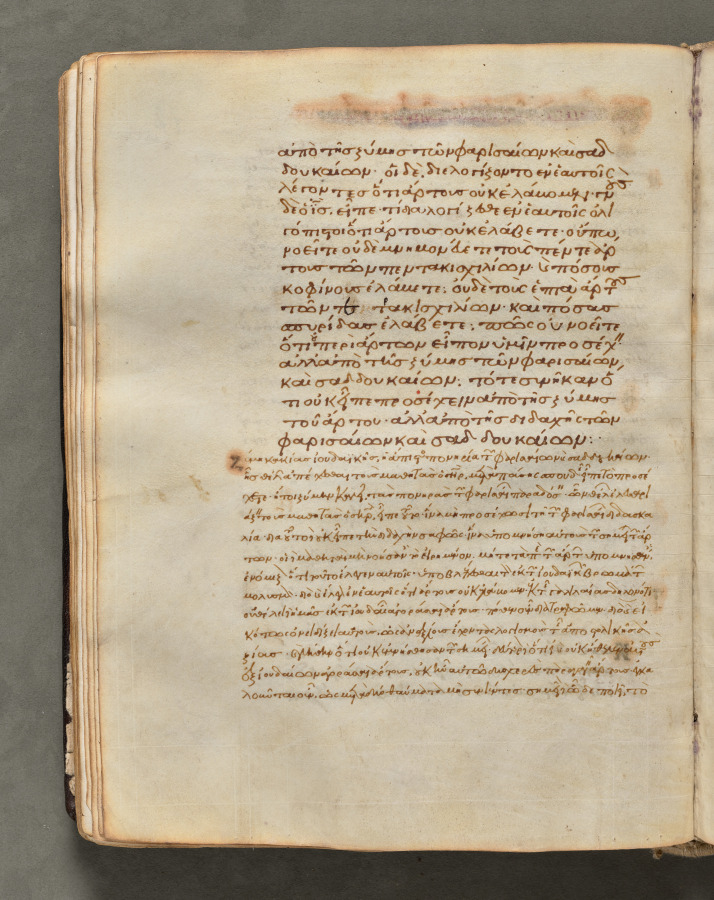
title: Text, folio 72 (verso), from a Gospel Book with Commentaries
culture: Byzantium, Constantinople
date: c. 1000–1100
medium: ink, tempera, and gold on vellum; leather binding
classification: Bound Volume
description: Each of the four gospels in this book opens on a page with brilliantly illuminated borders depicting the author of the text as well as birds-principally peacocks, symbols of the immortality of the soul-and fountains, representing the fountain of life and the salvation of the soul. This volume consists of 428 leaves with texts in Greek. Its level of sophistication suggests that it was probably written and decorated in a monastery in Constantinople.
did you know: Gospel Books were carried in procession through Byzantine churches.